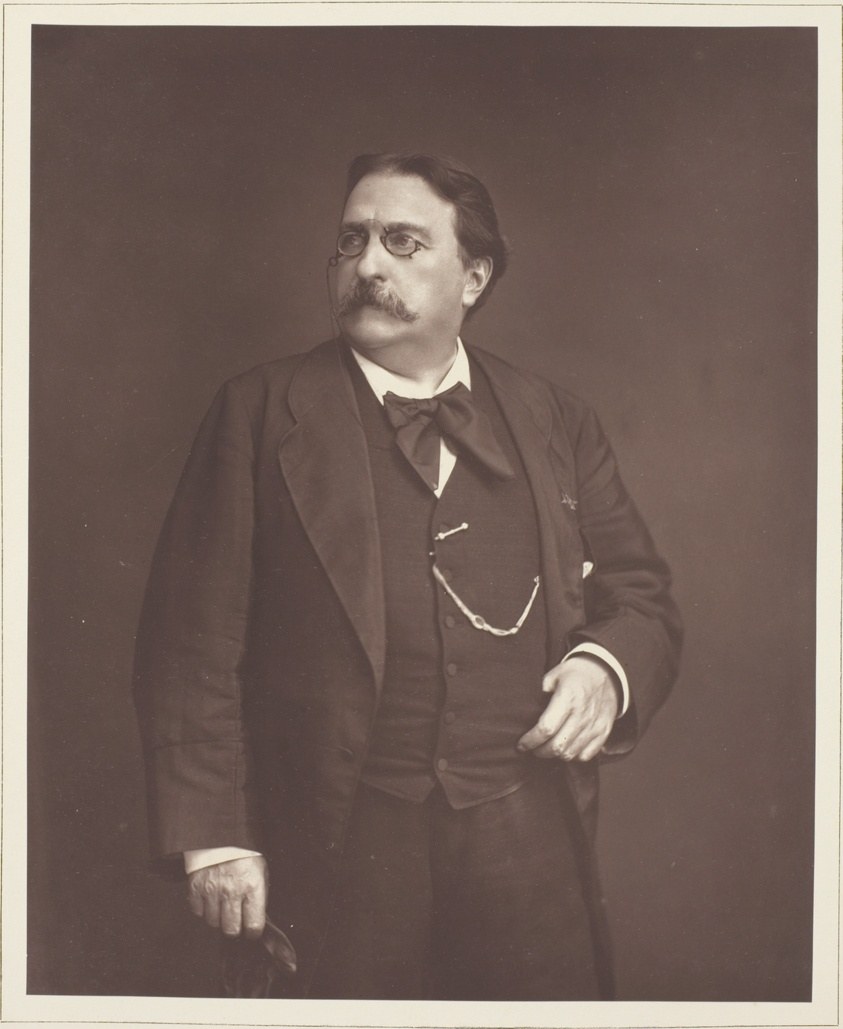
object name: Photograph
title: Hector Giacomelli (French painter, illustrator, and printmaker, 1822-1904)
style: 19th century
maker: Ferdinand J. Mulnier (French, born 1825, active 1860–1890)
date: c. 1876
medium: Woodburytype, from the periodical “Galerie Contemporaine Littéraire, Artistique” (1879), volume 8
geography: France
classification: woodburytype; photomechanical process; photography; photograph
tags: Collected by Hugh Edwards, Paris, Contemporaine Littéraire